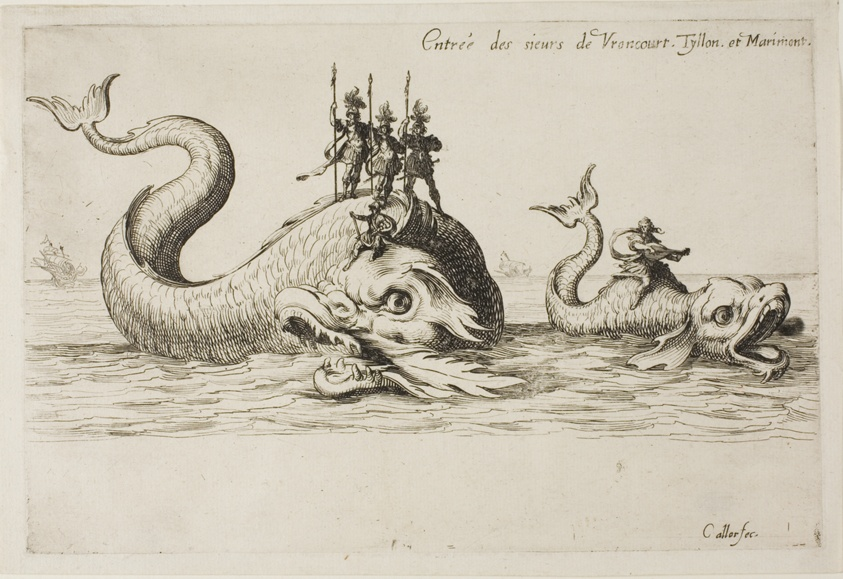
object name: Print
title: Entry of Mm. de Vroncourt, Tyllon, and Marimont, from The Combat at the Barrier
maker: Jacques Callot (French, 1592-1635)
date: 1627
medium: Etching in black on ivory laid paper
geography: France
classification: etching; print; prints and drawing